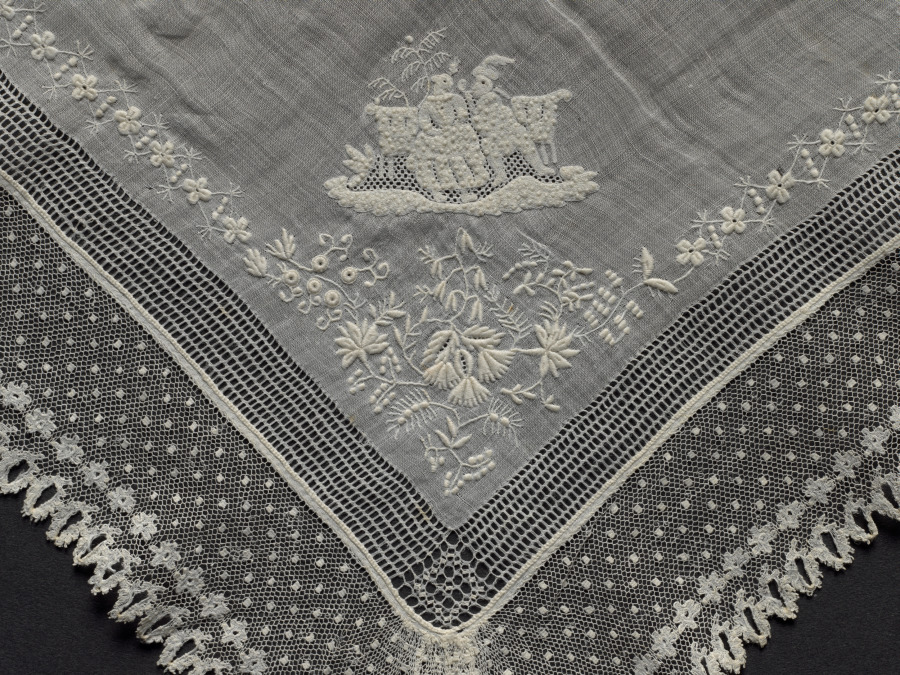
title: Lace Handekrchief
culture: France or Flanders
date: 1800–1820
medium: Plain weave linen ground: bobbin lace (Lille lace) edging and embroidery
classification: Embroidery